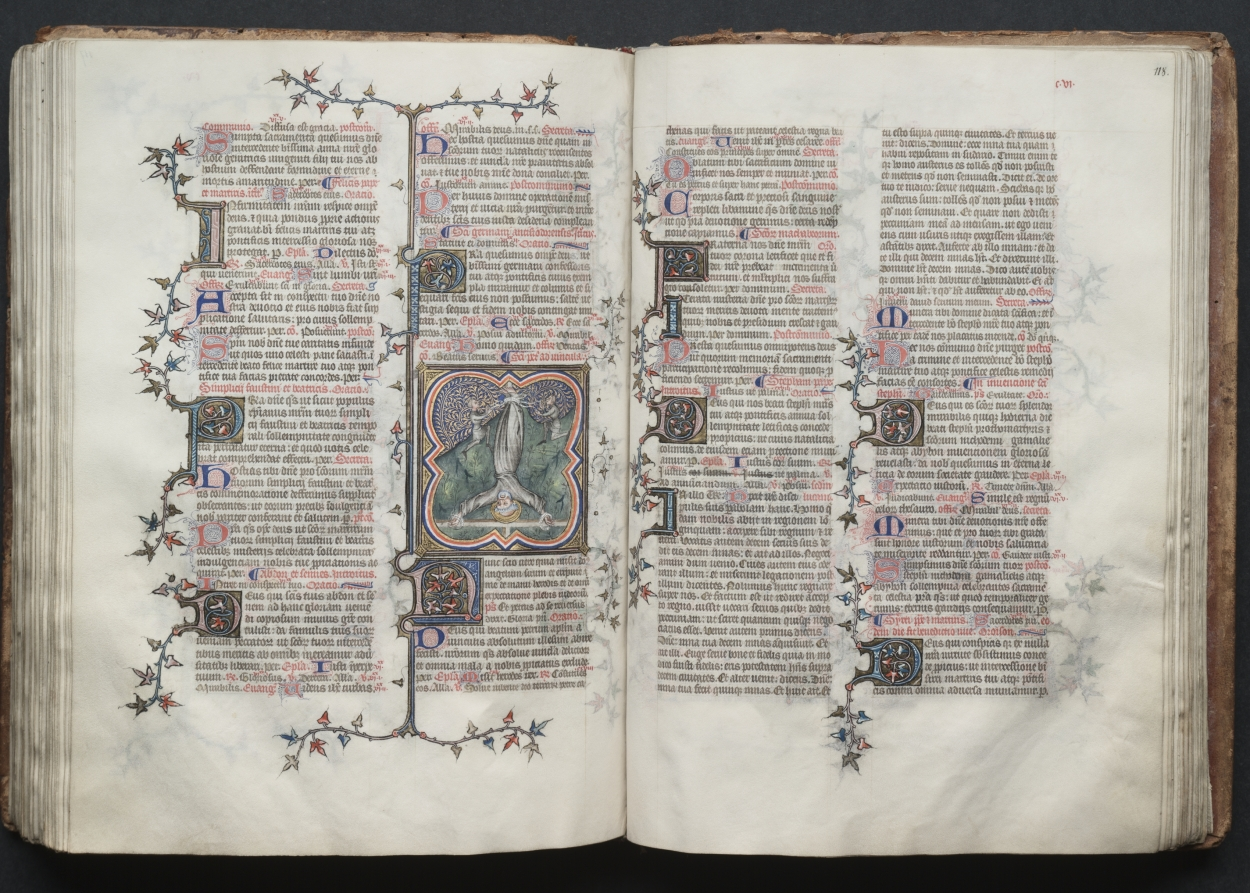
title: The Gotha Missal: Fol. 118r, Text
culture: France, Paris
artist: Master of the Boqueteaux (French)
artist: and Workshop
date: c. 1375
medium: ink, tempera, and gold on vellum; blind-tooled leather binding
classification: Bound Volume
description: The style and quality of this manuscript's decoration is typical of deluxe Parisian books made for aristocratic or royal patrons. Most of the book's decoration appears to be the work of the Master of the Boqueteaux, an artist active at the court of King Charles V (died 1380). His style was apparently shared by a number of book illuminators working in and around Paris. It is very possible that the Gotha Missal belonged to Charles V, but is not provable because the manuscript has no royal portraits and lacks a colophon. Given the book's magnificent decoration, however, it would seem that it was produced for a Valois prince, if not for the king himself. The manuscript receives its name from the German dukes of Gotha, its later owners.